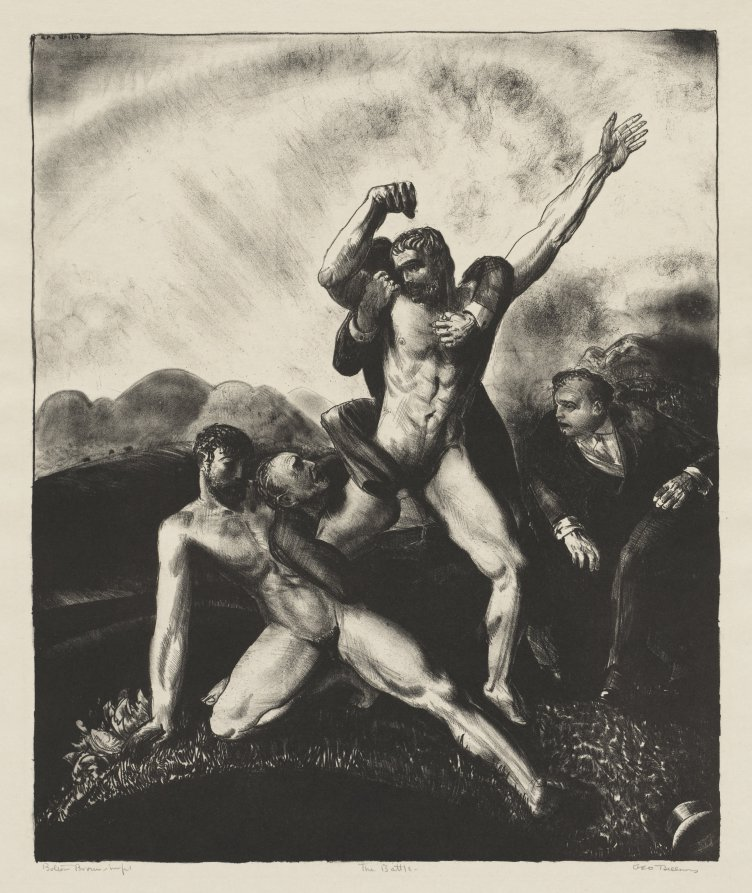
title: The Battle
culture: America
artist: George Bellows (American, 1882–1925)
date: 1924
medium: lithograph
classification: Print